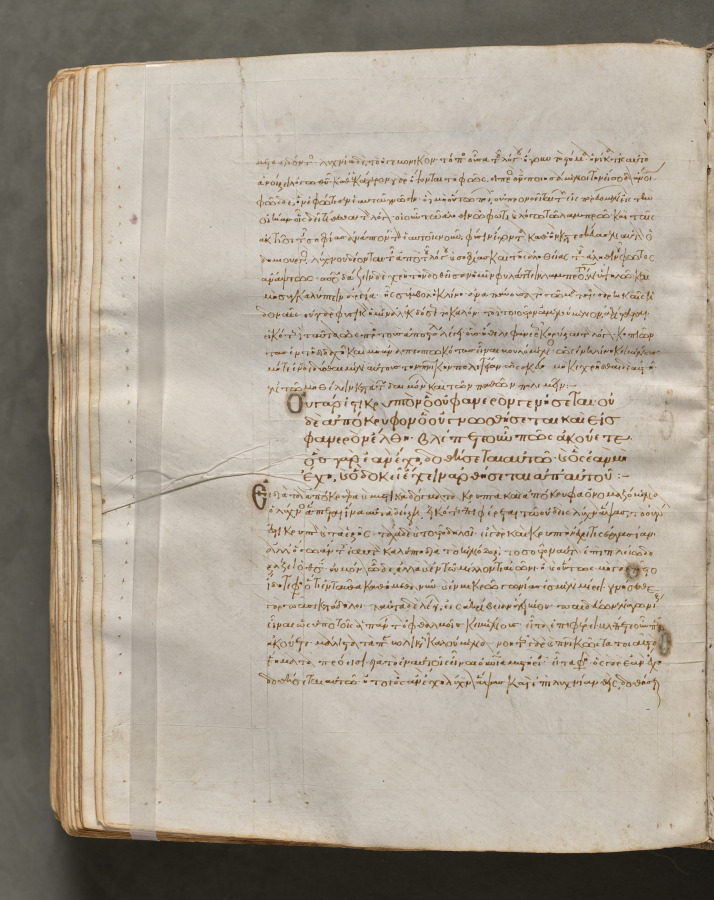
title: Text, folio 239 (verso), from a Gospel Book with Commentaries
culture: Byzantium, Constantinople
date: c. 1000–1100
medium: ink, tempera, and gold on vellum; leather binding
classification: Bound Volume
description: Each of the four gospels in this book opens on a page with brilliantly illuminated borders depicting the author of the text as well as birds—principally peacocks, symbols of the immortality of the soul—and fountains, representing the fountain of life and the salvation of the soul. This volume consists of 428 leaves with texts in Greek. Its level of sophistication suggests that it was probably written and decorated in a monastery in Constantinople.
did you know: Gospel books were carried in procession through Byzantine churches.